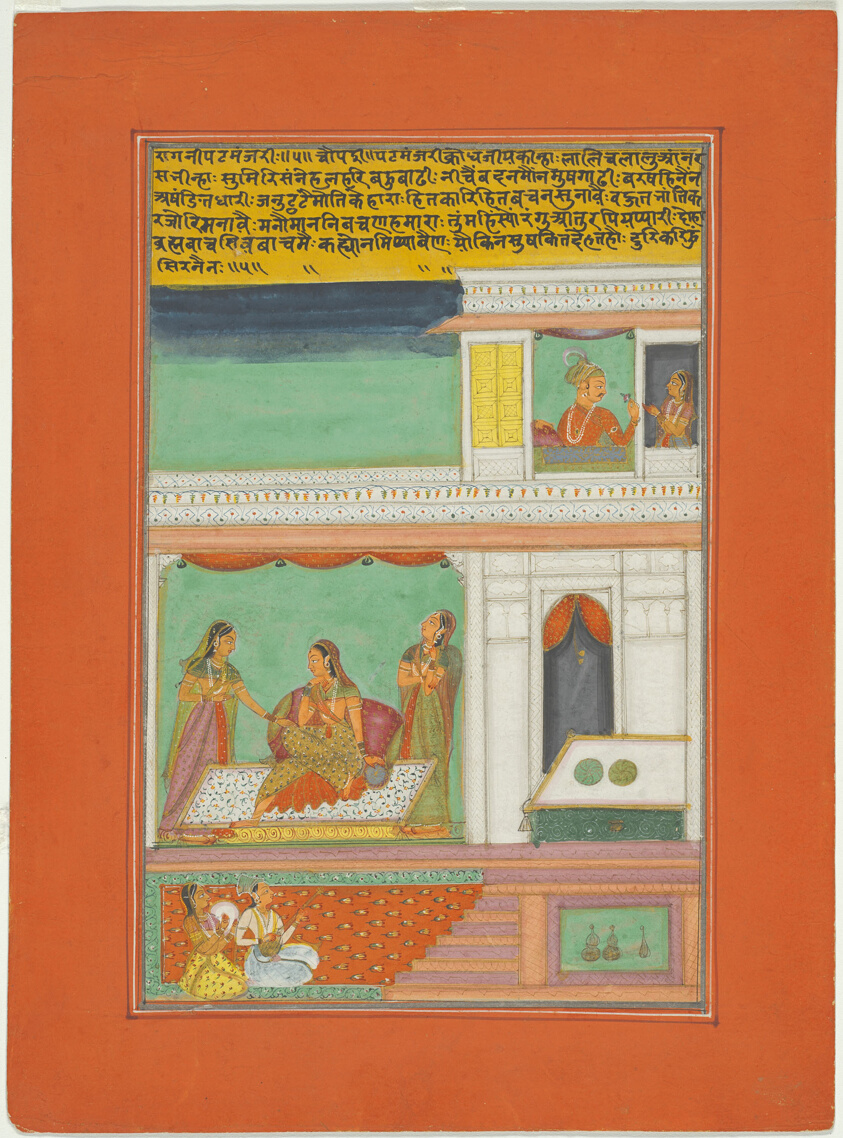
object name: Painting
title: Ragini Patmanjari, Page from a Jaipur Ragamala Set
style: South Asian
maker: India; Rajasthan, Jaipur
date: c. 1750-1770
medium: Opaque watercolor on paper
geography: Rajasthan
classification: miniature painting; painting; asian art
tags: music, musicians